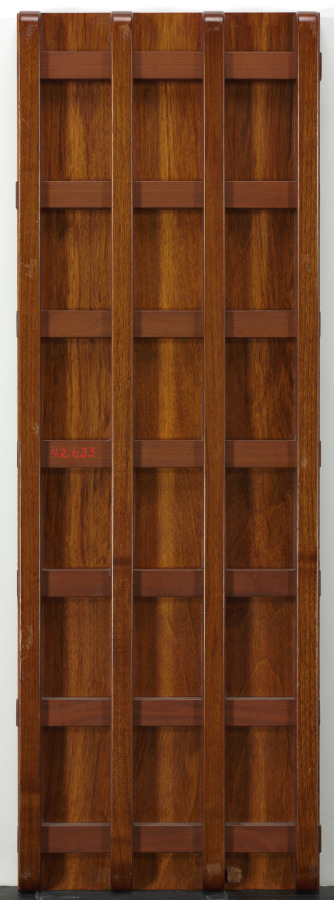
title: Saint Catherine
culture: Flanders, Bruges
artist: Master of the Holy Blood (Netherlandish)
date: c. 1520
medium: tempera on wood panel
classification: Painting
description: Saint Catherine holds the sword with which she was martyred. This painting and another in the collection (1942.633.2) were originally the wings of an altarpiece flanking a central panel, now lost, that may have depicted the Holy Family. The identity of this artist is unknown, but he is named for a painting in the Chapel of the Holy Blood in Bruges. Bruges flourished as an international commercial center through the 1400s and early 1500s. Among its residents were many foreign merchants and bankers who, along with the Burgundian court, patronized artists and attracted specialized craftsmen such as furriers, hatters, jewelers, and goldsmiths. Bruges’s artistic production in the 1400s included celebrated artists like Jan van Eyck, Petrus Christus, Hans Memling, and Gerard David who painted large altarpieces, small panels for private devotion, and portraits. Bruges also remained an important center for the production of illuminated manuscripts.